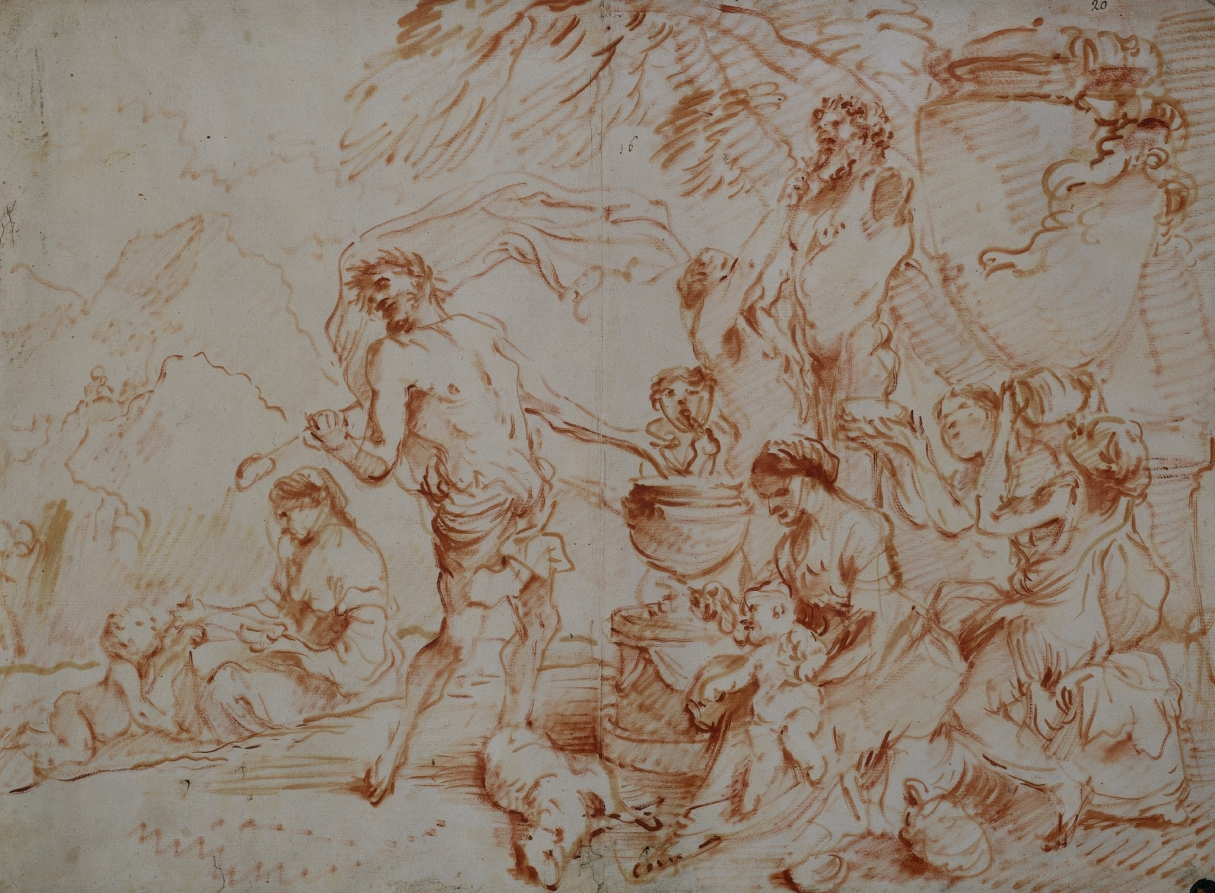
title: Bacchanal Before a Herm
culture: Italy, 17th century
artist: Giovanni Benedetto Castiglione (Italian, 1609–1664)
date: early 1660s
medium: oil and red-brown pigment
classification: Drawing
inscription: upper right, in brown ink: 20 ; upper center, in brown ink: 16 ; VERSO, lower left, in brown ink: 70 [sideways]